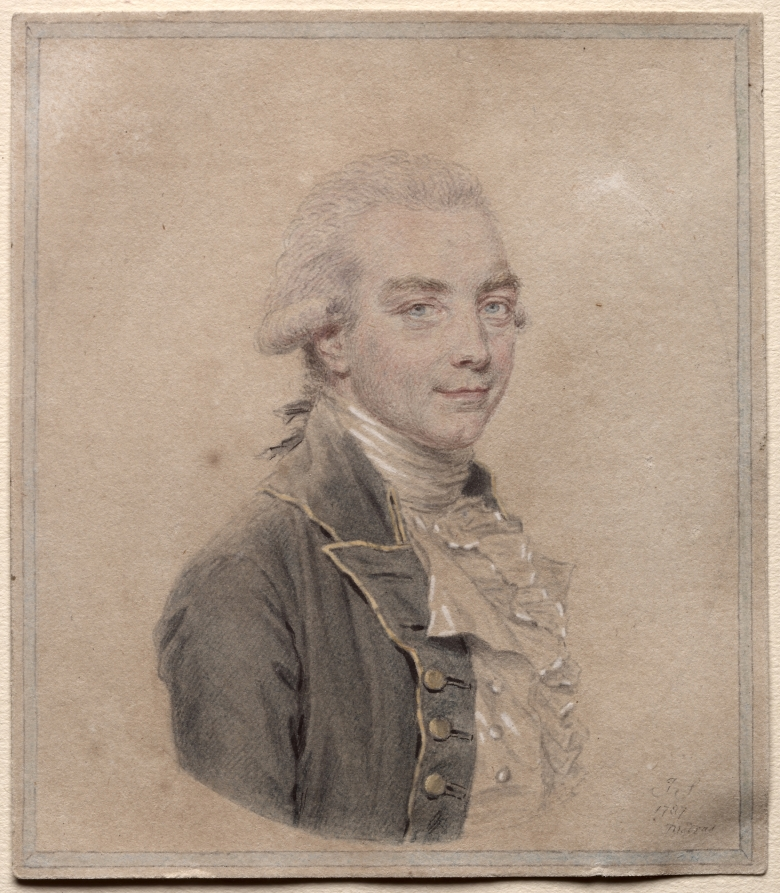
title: Portrait of Sir John Macpherson, 1st Baronet, Governor-General of India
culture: England, 18th century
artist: John I Smart (British, 1741–1811)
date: 1787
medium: watercolor and gouache heightened with white gouache on paper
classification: Portrait Miniature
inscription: signed, lower right, in black ink: J S / 1787 / Madras ; VERSO, lower right, in graphite: 6 1/8 x 6 7/8 Foskett, Daphne. John Smart: The Man and His Miniatures, pp. 13, 76, 89. London: Cory, Adams & Mackay, 1964.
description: The sitter’s head and shoulders face left. He smiles slightly and has light blue eyes, with his powdered hair curled above the ear and tied en queue. He wears a green jacket edged in gold with gold buttons and dons a high white collar, a waistcoat, and a frilled cravat, each highlighted with white gouache. The nature of this work as a finished drawing rather than exclusively a preparatory sketch for a miniature on ivory is evident in the degree of finish of the sitter’s clothing, which is painted to the oval termination within a border of pale blue gouache. A Colnaghi label was removed from the verso after the work entered the museum’s collection. Sir John Macpherson (1745–1821) was the son of a Scottish minister. His many tours of service with the East India Company were marred by corruption and scandal. He was made acting governor-general of India in 1785–86 between the resignation of Warren Hastings (1732–1818) and the succession by Lord Cornwallis (1738–1805). Macpherson was created a baronet in 1786 when he was removed from office, returning to England shortly thereafter. He was an inveterate bachelor, popular in society for his handsomeness, charm, and facility with languages, but also known for his avarice and fraudulence. The work is signed with Smart’s initials and dated “1787 Madras” at the lower right. Macpherson was no longer governor-general in 1787 and would have been preparing to return to England when this portrait was painted. The drawing is inscribed on the back in the artist’s hand: “a sketch of Sir John Macpherson painted at Madras, 1787, on his passage from Bengall [sic] to England by Jno [sic] Smart.” Smart did not return to England until 1795, so the word passage must be defined as “on his journey” rather than “aboard ship.” At the time this portrait was taken, Macpherson was grappling with his premature removal from office and beginning to plot what would become many years of negotiations to regain his position or receive compensation for having lost it, though none of this emotional turmoil is visible in Smart’s portrait.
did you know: John Smart retained hundreds of sketches which were passed down in turn to his son, granddaughter, and great-grandchildren.